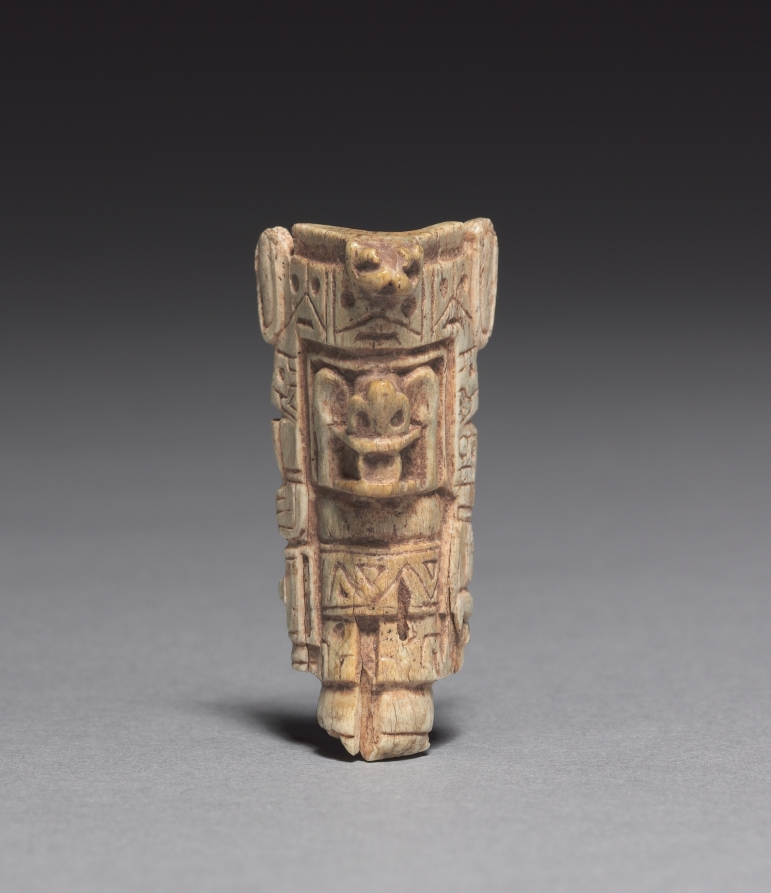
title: Sacrificer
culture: Bolivia, Peru or Chile, Southern Highlands, early Tiwanaku style, 400-1000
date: 400–1000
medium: carved bone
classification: Sculpture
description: Holding an axe in one hand, a human head in the other, this figurine depicts a ritual sacrificer. His fierce mask probably portrays either a puma or a fox. Incised patterns on the figure's body and headdress indicate elaborate tapestry garments. The ancient rituals embodied by this small carving must have been both visually spectacular and emotionally powerful.